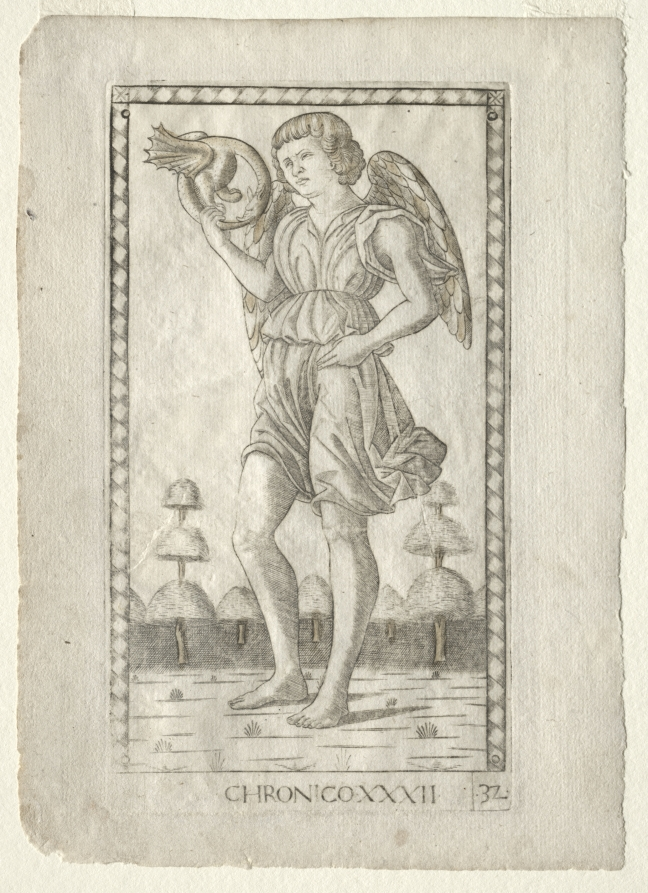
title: Genius of Time (from the Tarocchi, series B: Cosmic Principles & Virtues, #32)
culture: Italy, Ferrara, 15th century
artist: Master of the E-Series Tarocchi (Italian, active 1460s)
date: before 1467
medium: engraving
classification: Print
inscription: Lettered below the image of Chronico (Genius of Time): [B] / ·CHRONICO·XXXII· / ·32·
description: This engraving is part of the group marked with the letter “B,” and named Cosmic Principles and the Virtues, which comprises the three Universal principles or Genii (Light, Time, and Space) alongside the four cardinal virtues (Prudence, Temperance, Fortitude, and Justice) and the three theological ones (Faith, Hope, and Charity). The three allegorical figures of the Genii open group B and appear to be an artistic invention of the author of the Tarocchi series. Here, Chronico (Genius of Time) is personified as a full-length winged male youth in profile, turned to left. Behind him is a forest. In his right hand, Chronico holds up a dragon biting its own tail, an emblem of for “all-devouring Time.”